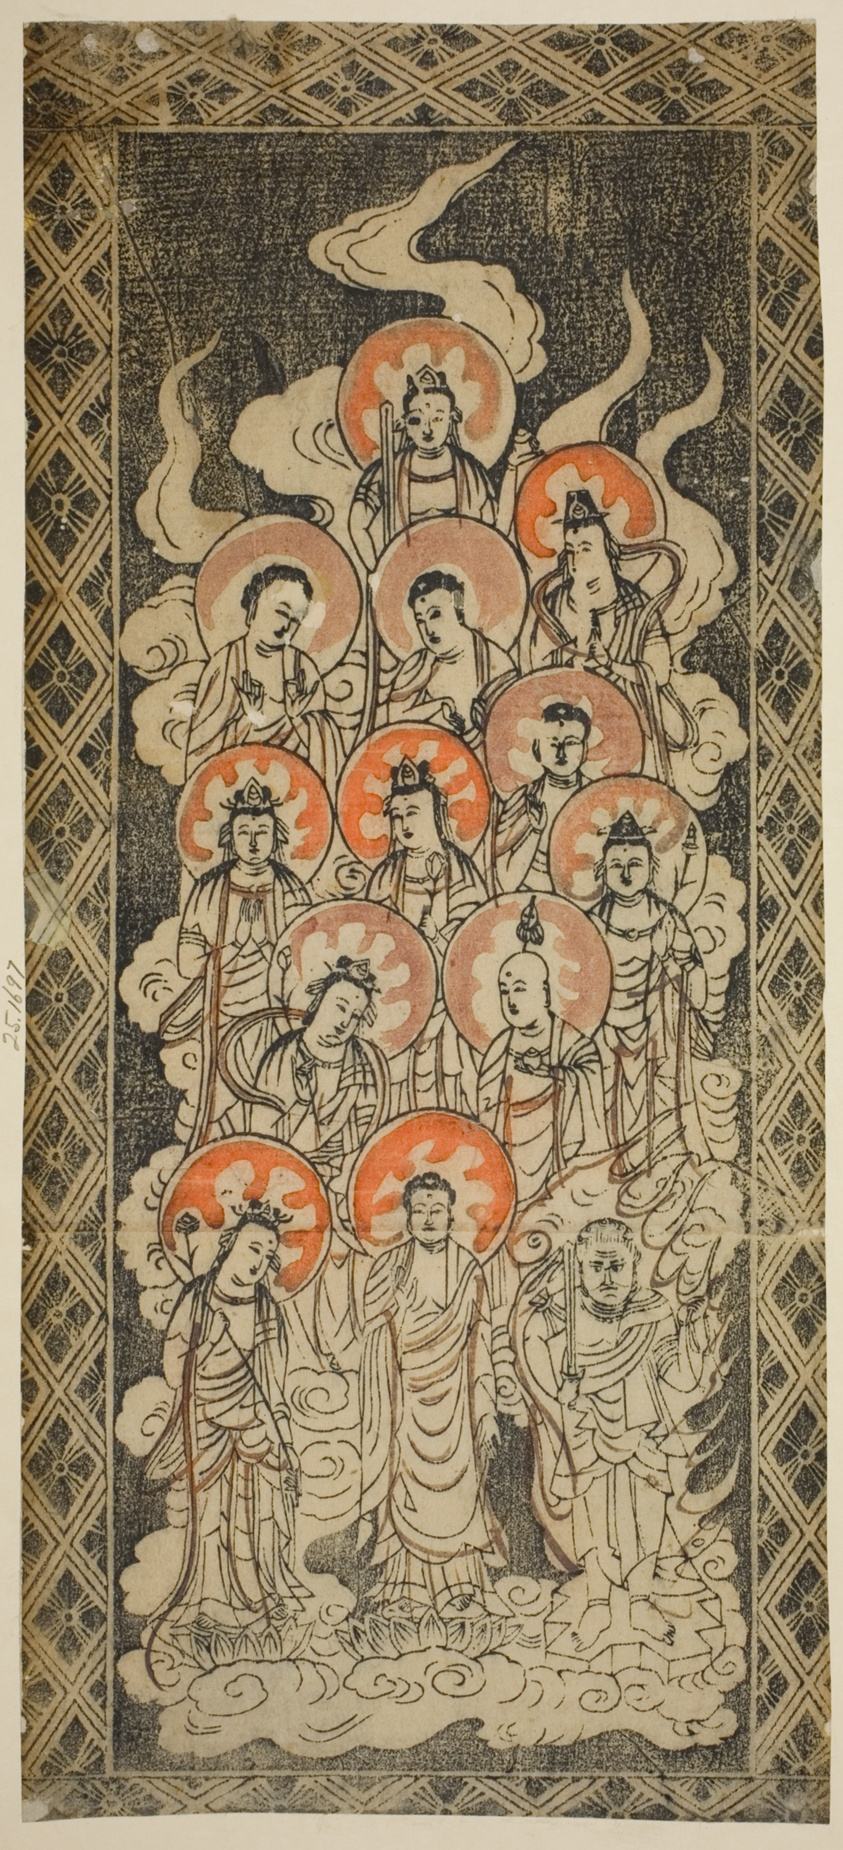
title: The Thirteen Buddhas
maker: Japanese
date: 16th century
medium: Hand-colored woodblock print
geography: Japan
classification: woodblock print; print; asian art